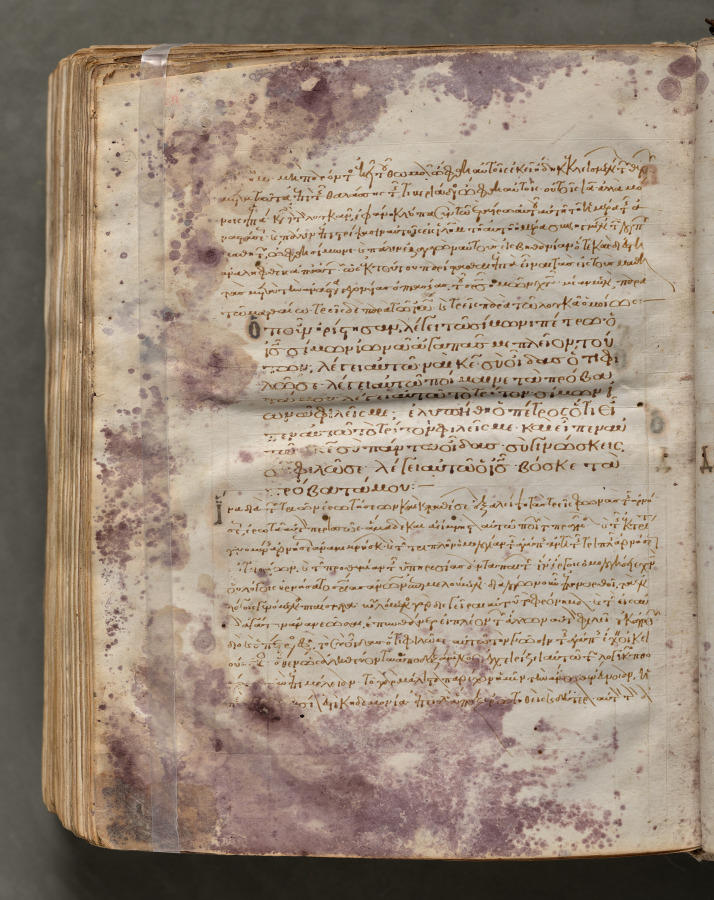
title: Text, folio 423 (verso), from a Gospel Book with Commentaries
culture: Byzantium, Constantinople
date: c. 1000–1100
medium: ink, tempera, and gold on vellum; leather binding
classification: Bound Volume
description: Each of the four gospels in this book opens on a page with brilliantly illuminated borders depicting the author of the text as well as birds—principally peacocks, symbols of the immortality of the soul—and fountains, representing the fountain of life and the salvation of the soul. This volume consists of 428 leaves with texts in Greek. Its level of sophistication suggests that it was probably written and decorated in a monastery in Constantinople.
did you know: Gospel books were carried in procession through Byzantine churches.